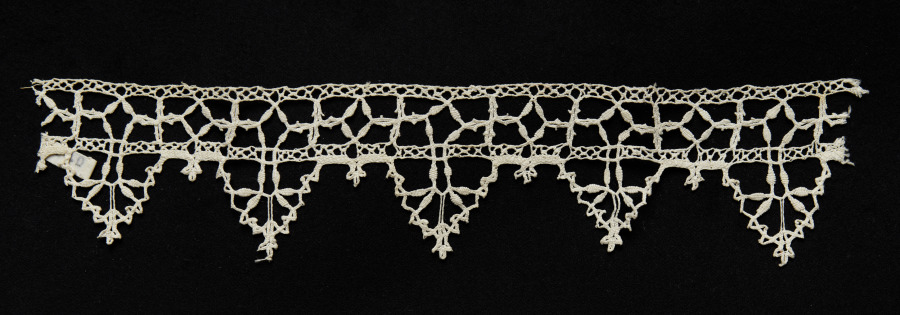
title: Lace Insertion with Edging of Points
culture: Italy, Genoa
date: 1550–99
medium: Bobbin lace (needle lace, reticella design)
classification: Lace